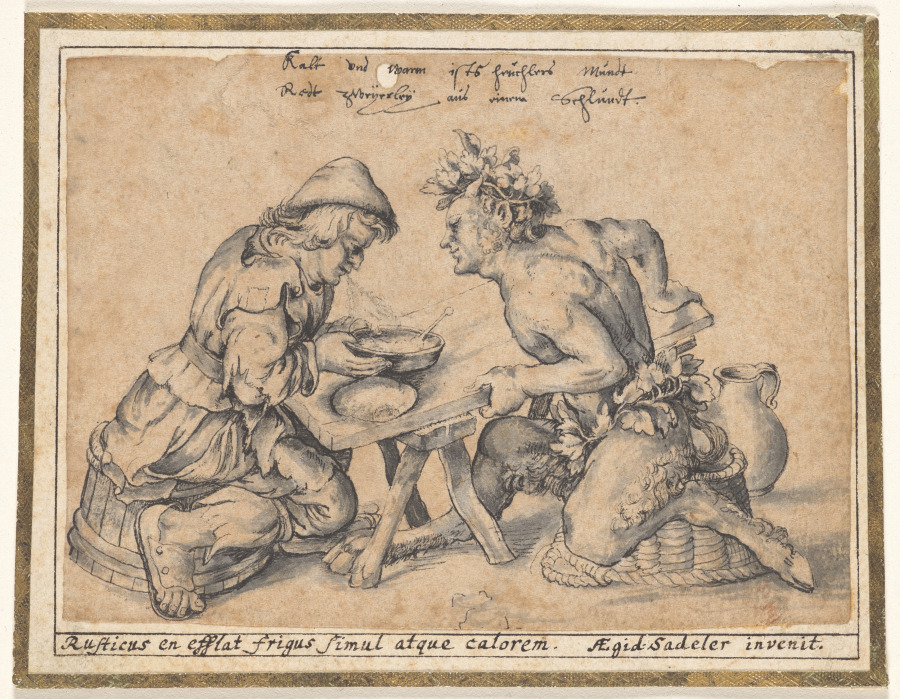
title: The Peasant Who Blew Hot and Cold (copy after Aegidius Sadeler)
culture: Germany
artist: after Aegidius Sadeler (Flemish, c. 1570–1629)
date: c. 1610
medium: pen and black ink and brush and gray wash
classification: Drawing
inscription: upper center, in black ink: Kalt und warm ist grü[illegible] mündt. / Redt [illegible] aüs [einem?] [soglünst?] ; SECONDARY SUPPORT, across bottom, in black ink: Rusticus en efflat frigus simul atque calorem. Ægid. Sadeler invenit. ; VERSO OF SECONDARY SUPPORT, upper center, in graphite: No. 124 ; over entire surface, in graphite: [14 lines in undetermined language]